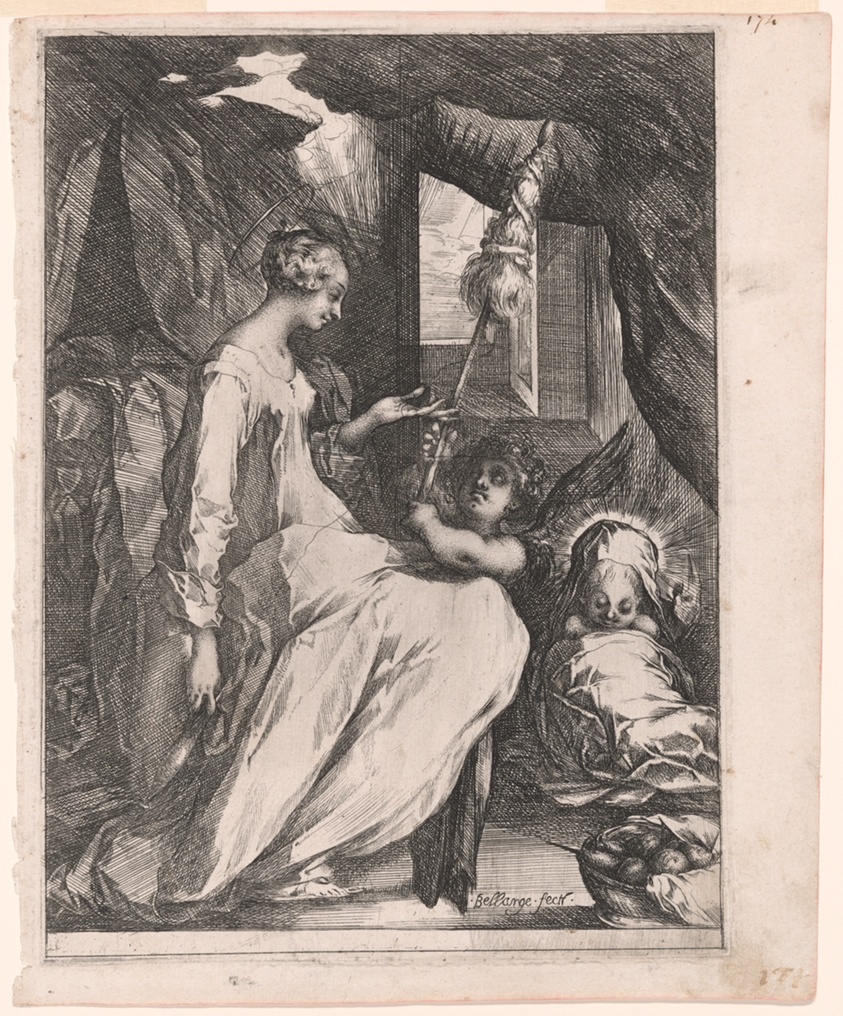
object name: Print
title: The Virgin and Child with Distaff and an Angel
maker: Jacques Bellange (French, c. 1575–1616)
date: c. 1615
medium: Etching in black on ivory laid paper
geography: France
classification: prints and drawing; paper; print; etching